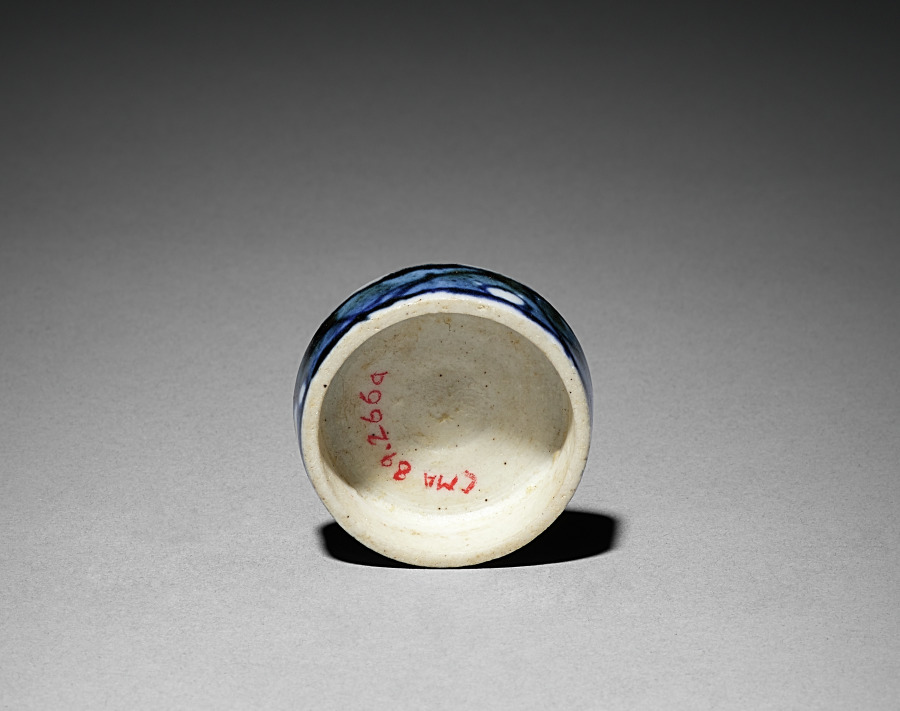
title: Tea Container (lid) with Plum Blossoms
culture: Japan, Edo period (1615–1868)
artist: Aoki Mokubei (Japanese, 1767–1833)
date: early 1800s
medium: porcelain with underglaze blue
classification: Ceramic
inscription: signed "Ro Mokubei" on base in underglaze blue.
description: Aoki Mokubei, born into a family of restaurateurs, was a potter, calligrapher, painter, and scholar, and is considered one of the three masters of later Edo period Kyoto ceramics. He specialized in porcelains fashioned after Chinese prototypes, and created works for steeped tea (sencha) such as these matching tea caddies decorated in an underglaze blue called sometsuke—literally “with applied dye.” He signed them on their bottoms. They also have intricately patterned silk sleeves to both beautify and protect them. On the exterior of the lid of the outer wooden box that contains them, it is written that Mokubei inscribed and painted an image on the box. On the interior of the lid, the signature and seals of a former owner are written. Mokubei has signed the lid of the inner box, and a charming ink and light color composition of West Lake in Hangzhou in China covers its three sides. On the fourth side is a long inscription by Mokubei describing the scene.